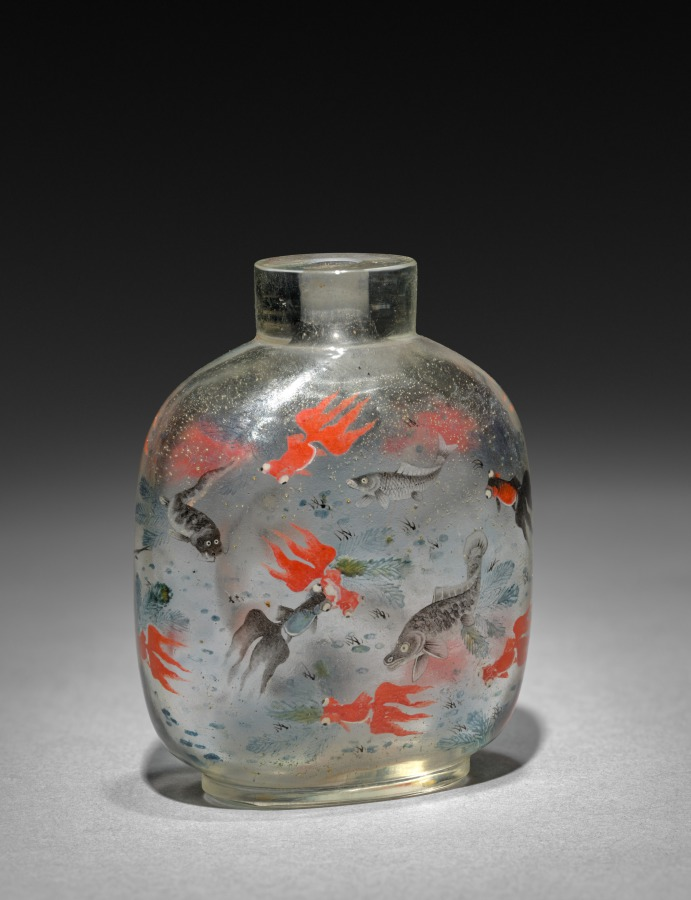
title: Snuff Bottle with Stopper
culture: China, Qing dynasty (1644–1911), Qianlong reign (1736–95)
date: 1736–95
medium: glass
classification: Glass